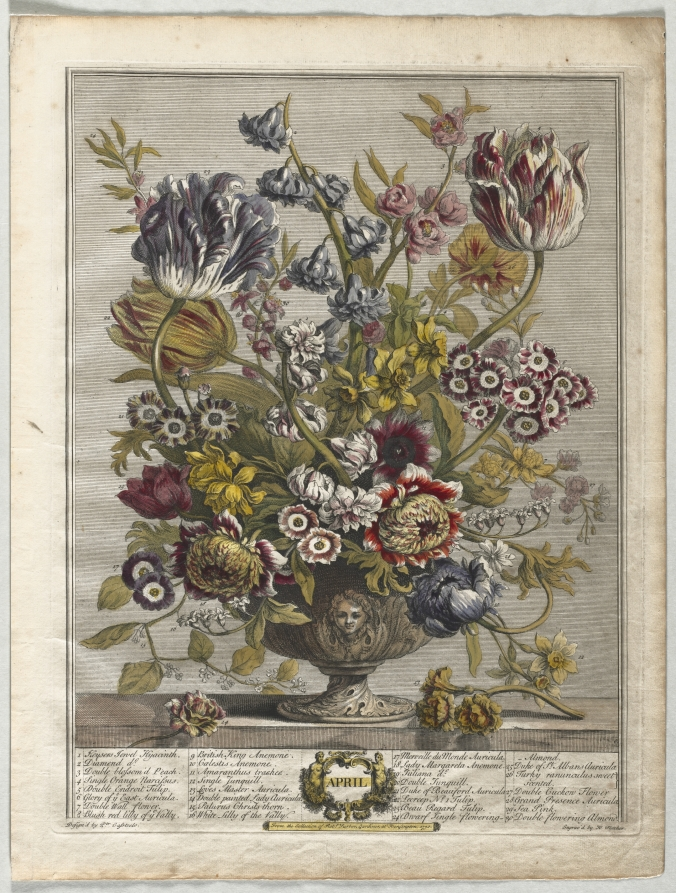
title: Twelve Months of Flowers: April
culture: England, 18th century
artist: Henry Fletcher (British, active 1715–38)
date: 1730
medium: engraving, hand-colored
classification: Print